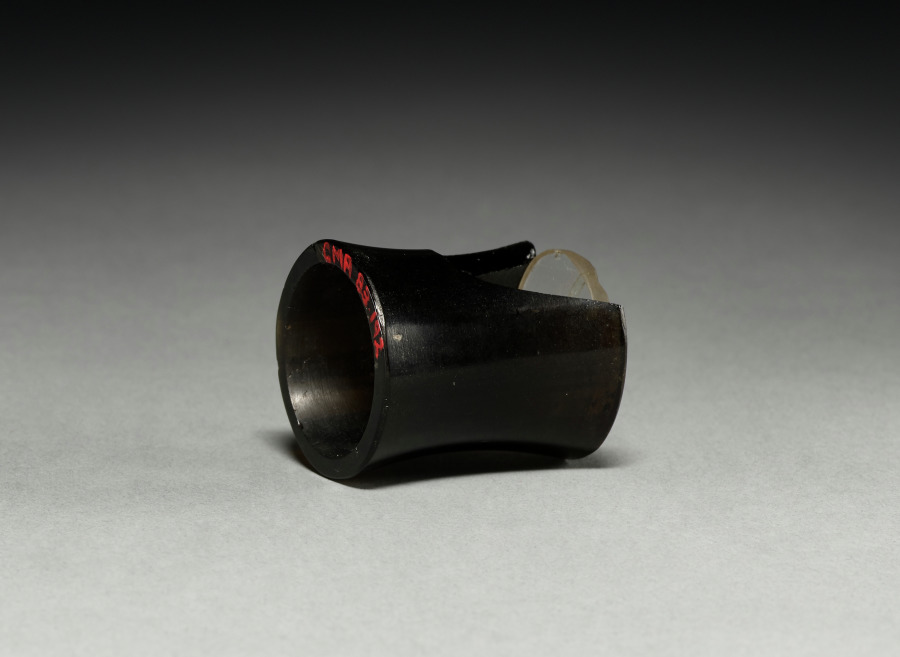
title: Ear Ornament (2 of 2)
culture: Mexico, Guerrero, Ichcatiopan, Mixtec or Aztec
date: c. 1200–1519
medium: obsidian, crystal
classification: Jewelry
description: This set of ear ornaments was reputedly found together with the gold and jade pectoral ornament shown nearby. They may have accompanied a noble burial, or perhaps constituted an offering deposit.